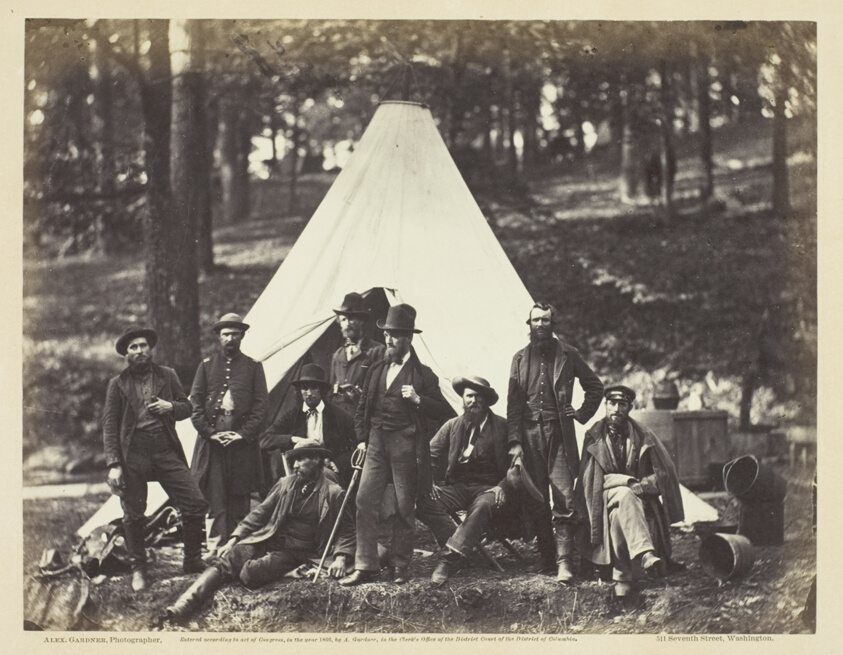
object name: Photograph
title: Scouts and Guides to the Army of the Potomac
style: 19th century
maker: Alexander Gardner (American, born Scotland, 1821–1882)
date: October 1862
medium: Albumen print, pl. 28 from the album "Gardner's Photographic Sketch Book of the War, vol. 1" (1866)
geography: United States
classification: photograph; albumen silver print; photography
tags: Collected by Hugh Edwards, Gardner's Photographic Sketch Book